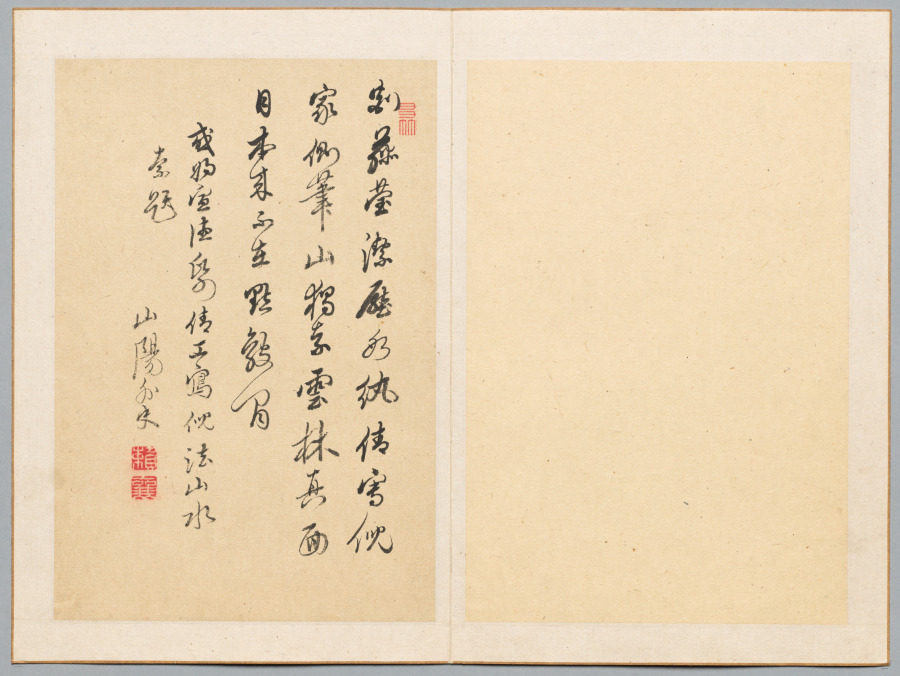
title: Poem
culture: Japan, Edo period (1615–1868)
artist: Rai Sanyō (Japanese, 1780–1832)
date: early 1800s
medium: leaf from a pair of folding albums; ink on paper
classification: Portfolio